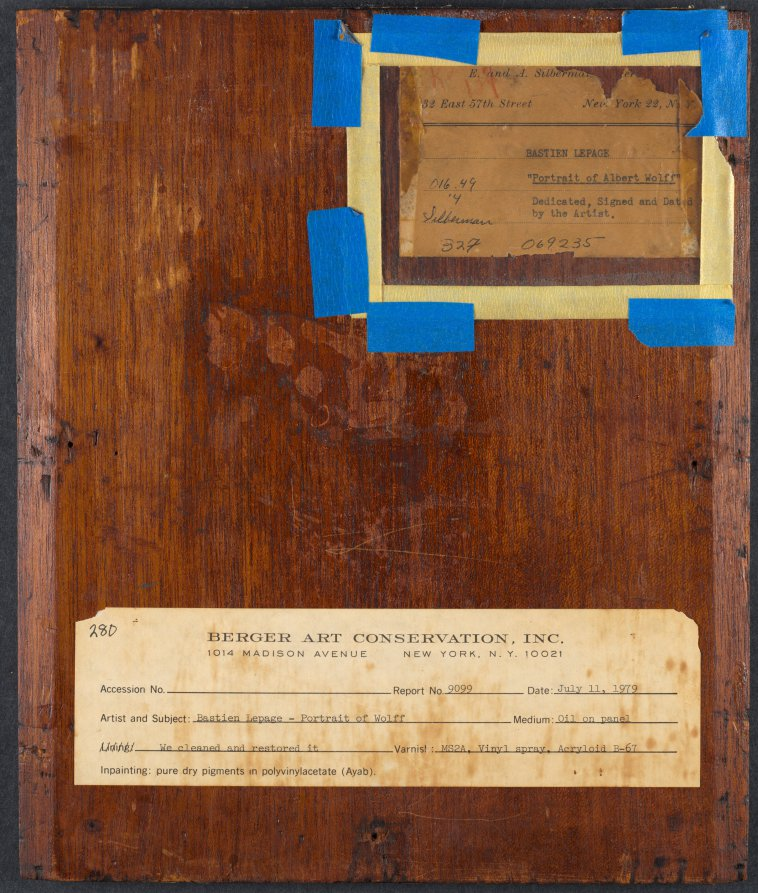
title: Albert Wolff in His Study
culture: France, 19th century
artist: Jules Bastien-Lepage (French, 1848–1884)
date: 1881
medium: oil on panel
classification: Painting